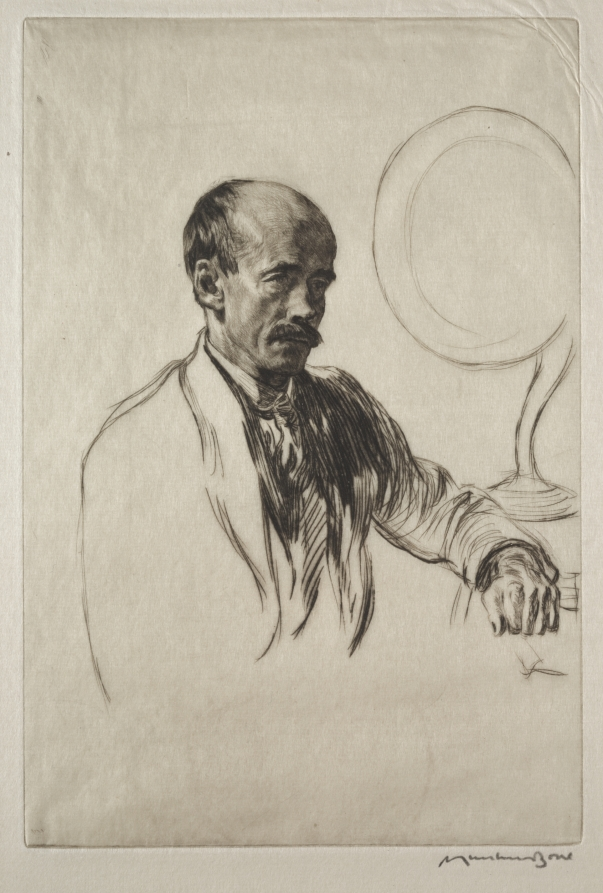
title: John Bone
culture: England, 20th century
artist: Muirhead Bone (British, 1876–1953)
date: 1934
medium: drypoint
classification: Print